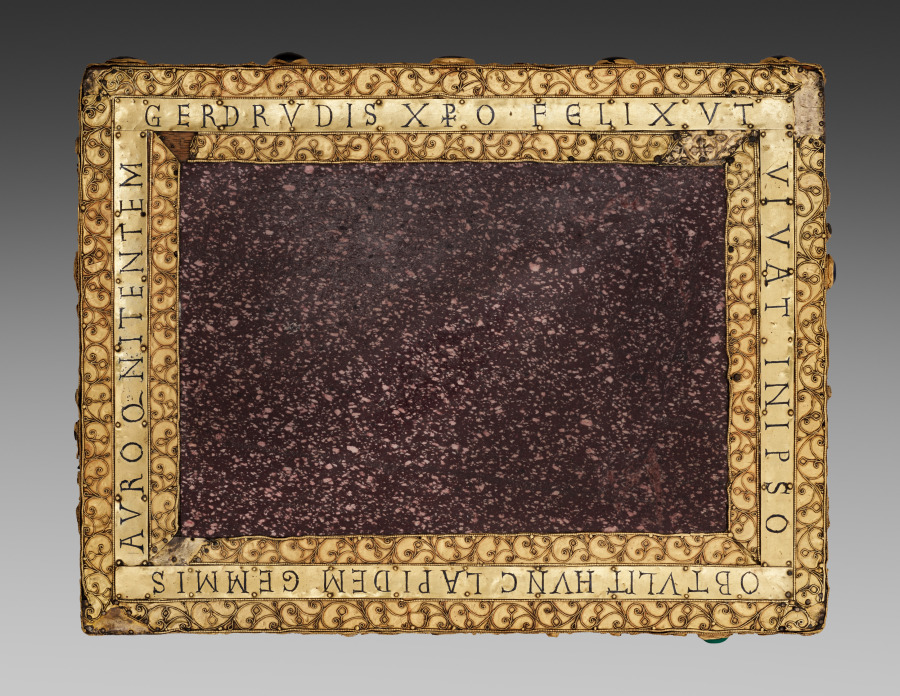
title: Portable Altar of Countess Gertrude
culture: Germany, Lower Saxony?, Romanesque period, 11th century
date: c. 1045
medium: gold, cloisonné enamel, porphyry, gems, pearls, niello, wood core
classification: Metalwork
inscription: GERDRVDIS XPO FELIX VT | VIVAT IN IPSO OBTVLIT HVNC LAPIDEM GEMMIS | AVROQ NITENTEM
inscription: SIGISMVNDVS, CONSTANTIVS, SANCTA CRVX, SCA ELENA, SCA ADALHEIT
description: Commissioned by Countess Gertrude of Brunswick, this portable altar is one of the Guelph Treasure’s earliest and most sumptuous objects. The choice of white-speckled porphyry as the altar stone signals Gertrude’s worldly aspirations; an imperial color since classical antiquity, porphyry was only used by the imperial family. Historical figures of royal and imperial rank are depicted with Christ, the Virgin, apostles, and archangels along the altar’s sides, stressing the countess’s political ambitions and claim of imperial lineage for her own dynasty. The Latin inscription surrounding the altar stone reads, "Gertrude offers to Christ, to live joyfully in him, this stone that glistens with gems and gold."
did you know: On the bottom of this altar is a trap door that opened to reveal small relics of saints wrapped in silk.